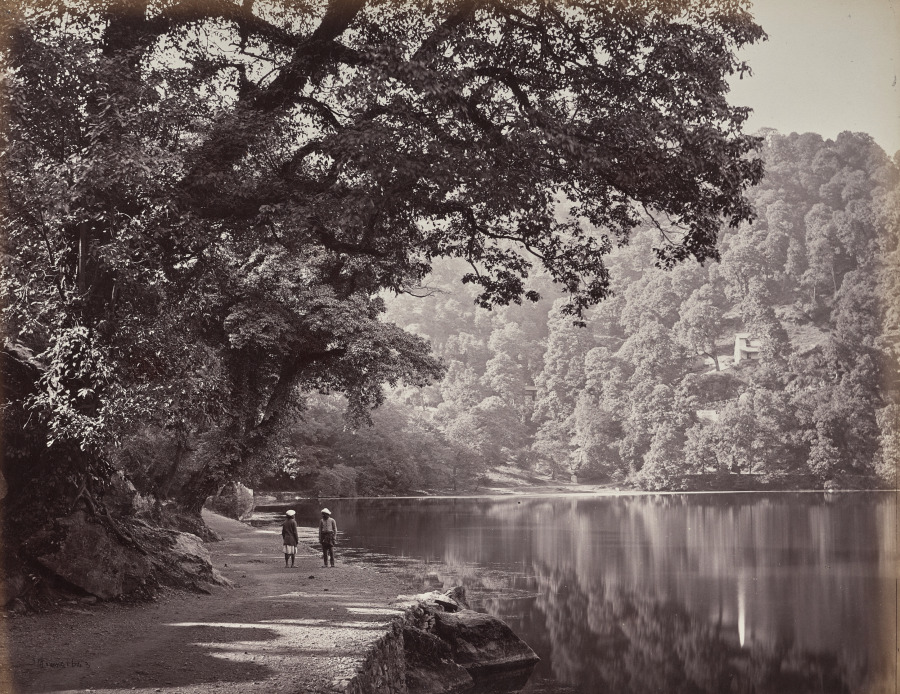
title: Hyree Lake. South End of the Lake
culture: England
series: Photographs of Northern India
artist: Samuel Bourne (British, 1834–1912)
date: 1863–70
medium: albumen print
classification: Photograph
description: The 50 images in this album, all taken in the 1860s, move from the hill towns of the Himalayas down to cities including Lahore (now in Pakistan), Delhi, Lucknow, Agra, Benares (now Varansi), and Calcutta (now Kolkata). Architectural studies of major monuments offer valuable historical records of what sites such as the Taj Mahal and the imperial mosque of the Mughal emperors in Delhi looked like before twentieth-century restorations.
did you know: Samuel Bourne, the author of most the images in this album, was a banker in England before he moved to India to become a professional photographer.